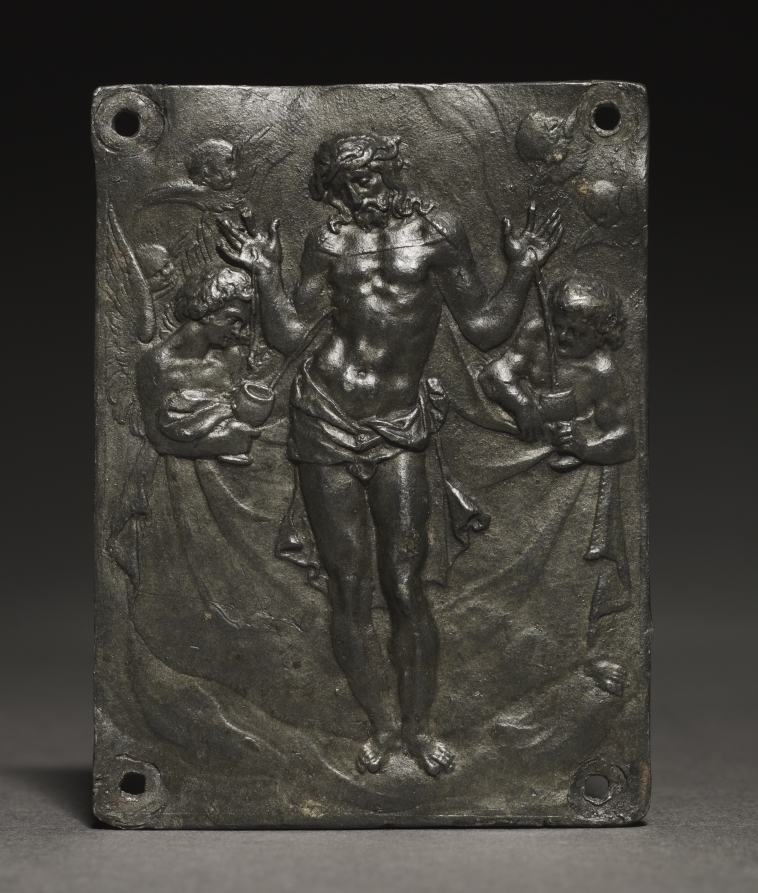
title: Ecce Homo (Behold the Man)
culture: Italy, Milan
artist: workshop or follower of Antonio Abondio (Italian, 1538–1591)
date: c. 1600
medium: lead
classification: Sculpture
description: Mass-produced plaquettes like this work offered high quality devotional images for private use. The Latin title of this work, according to the Gospel of John (19:1-5), refers to the words that were spoken by Pontius Pilate, the Roman governor of Judea, when he presented Christ, scourged and crowned with thorns, to the assembled crowds shortly before the Crucifixion. Here a full-length Christ reveals his wounds before angels who collect his blood in chalices, encouraging meditation on his suffering.